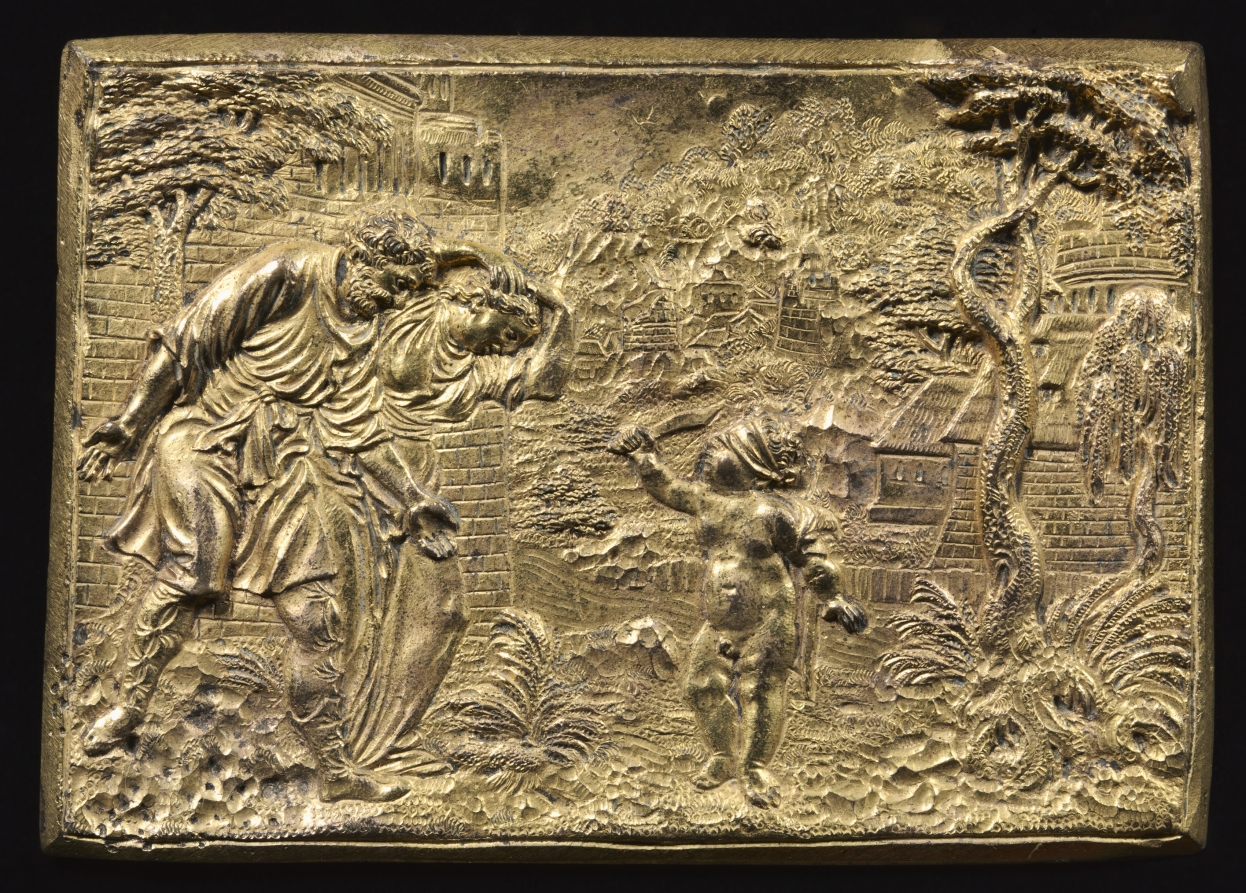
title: Allegory of Jealousy?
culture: Germany, Nuremberg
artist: Peter Flötner (German, 1485–1546)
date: 1500s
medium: gilt bronze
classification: Sculpture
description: The meaning of a small blindfolded child wielding a knife at an elderly couple is uncertain. Instead of a myth or historical subject, it more likely personifies an emotion.